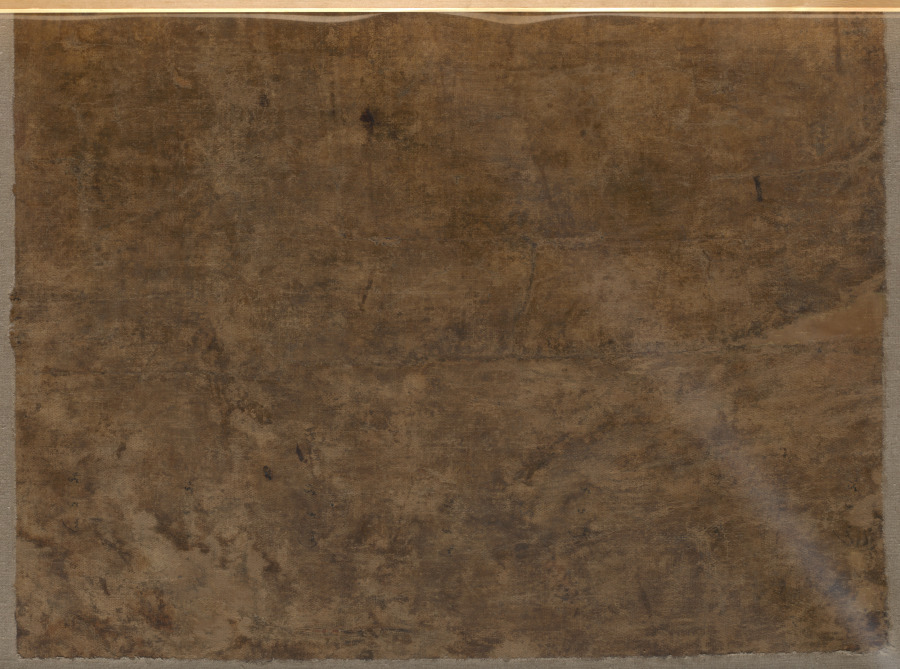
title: Tantric Buddha Vairochana as Vajrasattva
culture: Central Tibet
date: c. 1150–1200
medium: gum tempera, ink, and gold on cloth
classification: Painting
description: The seated Buddha dominating the composition is identified as Vairochana because of his hand gesture, the mudra communicating supreme enlightenment in which the index finger of one hand is grasped by the fingers of the opposite hand. His golden color and the tiny vajra—a six-pronged ritual object representing a thunderbolt—balanced on top of his finger suggest that he is in the guise of Vajrasattva, the summation of all enlightened beings. In his crown is the image of a monk, who is probably the guru of the donor, the small monastic figure at the lower right next to the lotus pedestal.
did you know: A mantra written behind the figures invokes their living presence in the thangka painting.